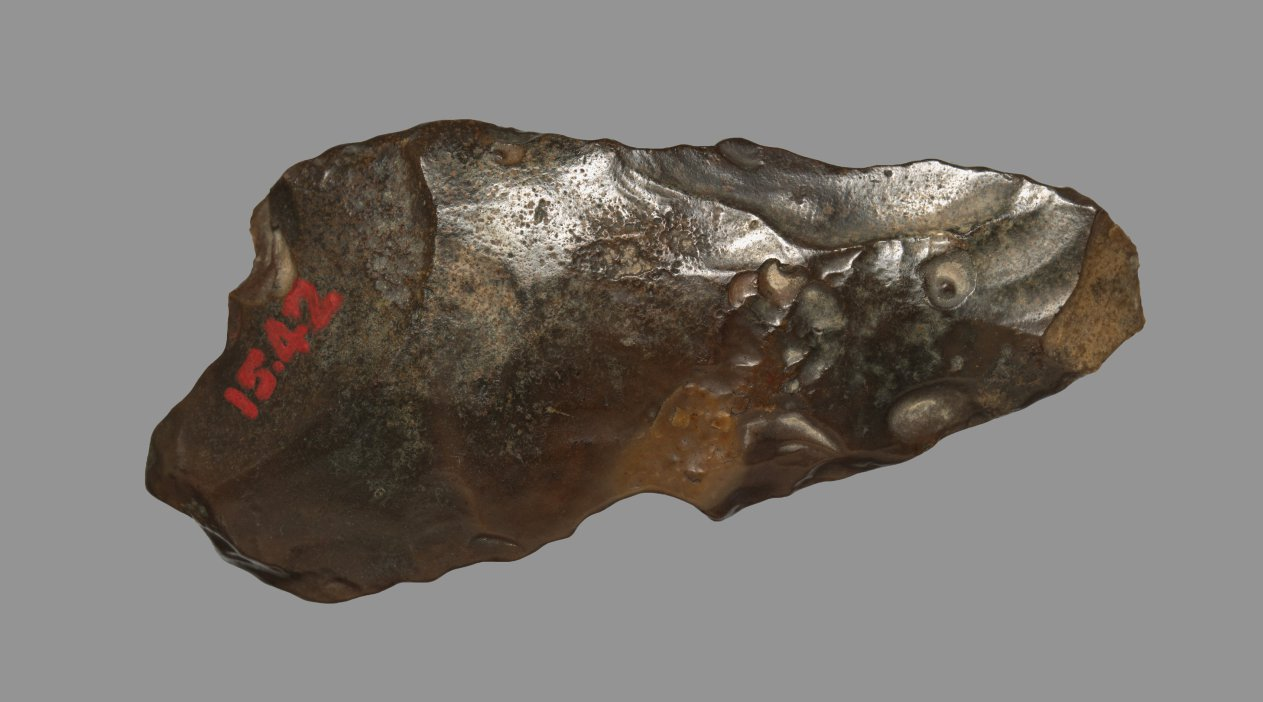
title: Hand Axe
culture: Egypt, Paleolithic period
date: c. 120,000–30,000 BCE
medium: black to dark-green flint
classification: Implements